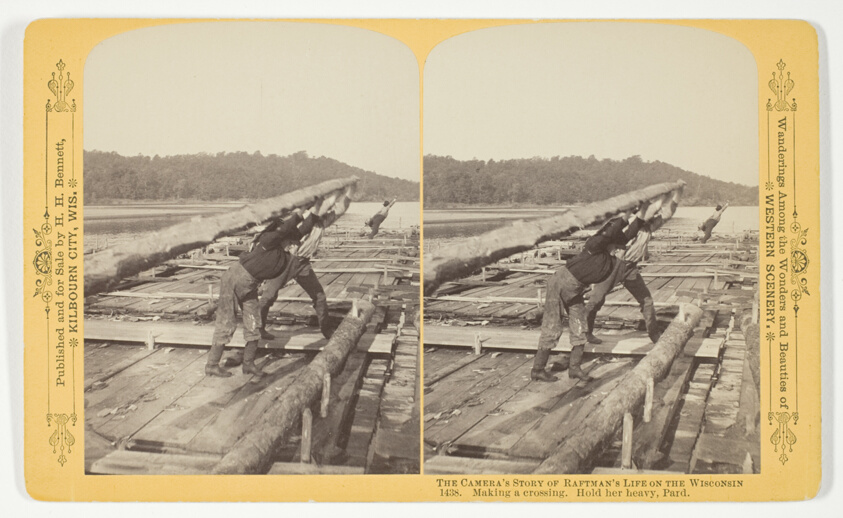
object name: Photograph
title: Making a Crossing. Hold Her Heavy, Pard. , from the series "The Camera's Story of Raftman's Life on the Wisconsin"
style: 19th century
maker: Henry Hamilton Bennett (American, born Canada, 1843–1908)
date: 1886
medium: Albumen print, stereo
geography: United States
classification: stereograph (albumen); albumen silver print; photographic process; photography; photograph